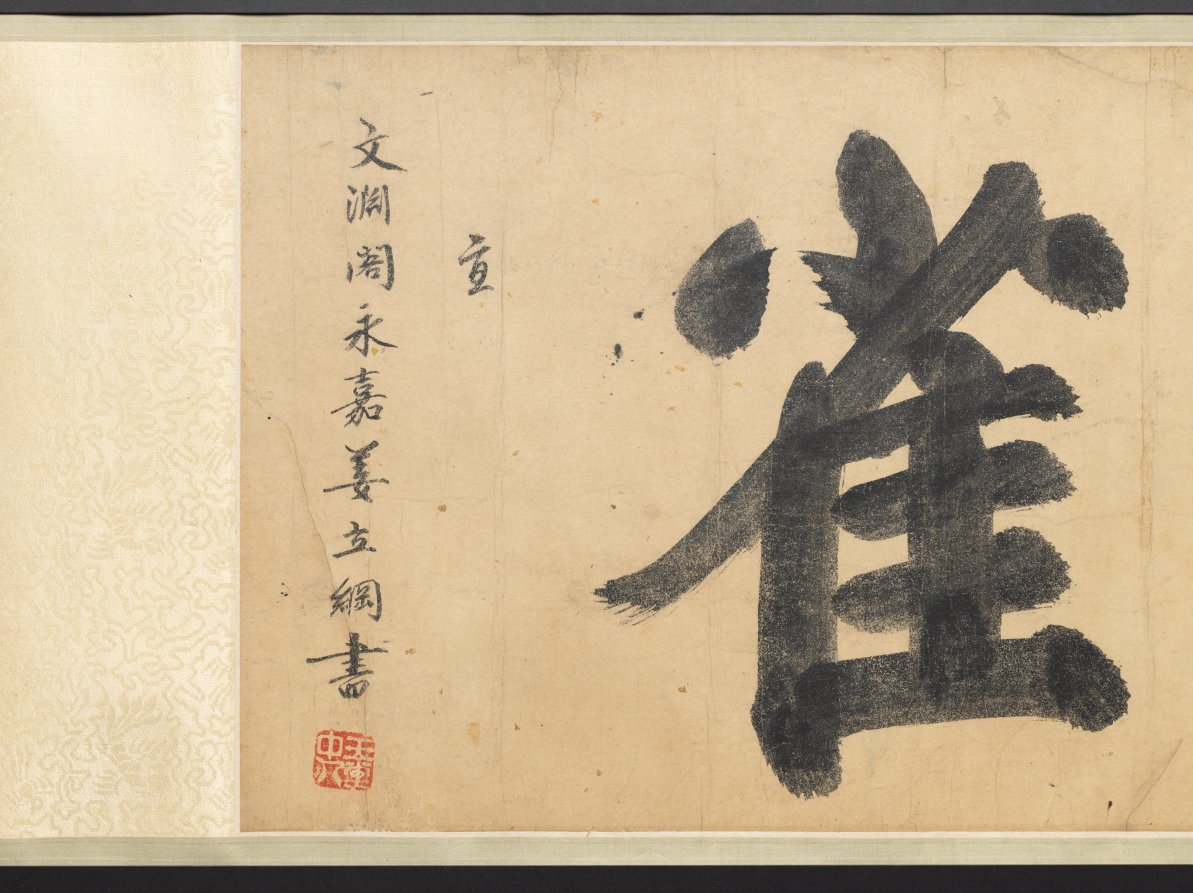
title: A Hundred Sparrows in a Lofty Grove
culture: China, Ming dynasty (1368–1644)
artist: attributed to Lin Liang (Chinese, 1416–1480)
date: 1368–1644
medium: handscroll; ink on silk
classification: Painting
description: Sparrows engaged in all kinds of activities frolic amid leafy branches, blades of grass, rocks, and a waterfall. As our eyes move over the scroll, the artist engages us in enjoying the sparrows’ carefree movements in a natural setting. The charming birds were painted from close observation in swift and fluent brushstrokes. Sparrows are a common bird and in Chinese painting they often represent the commoner in human society as opposed to the noble pheasant or peacock representative of the ruling class.